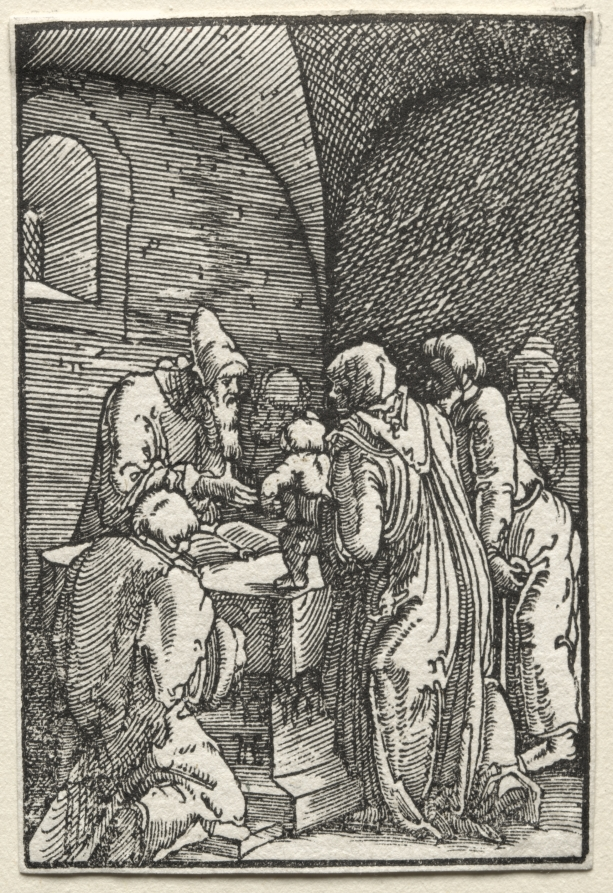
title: The Fall and Redemption of Man: The Presentation of Christ in the Temple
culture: Germany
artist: Albrecht Altdorfer (German, c. 1480–1538)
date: c. 1515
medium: woodcut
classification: Print